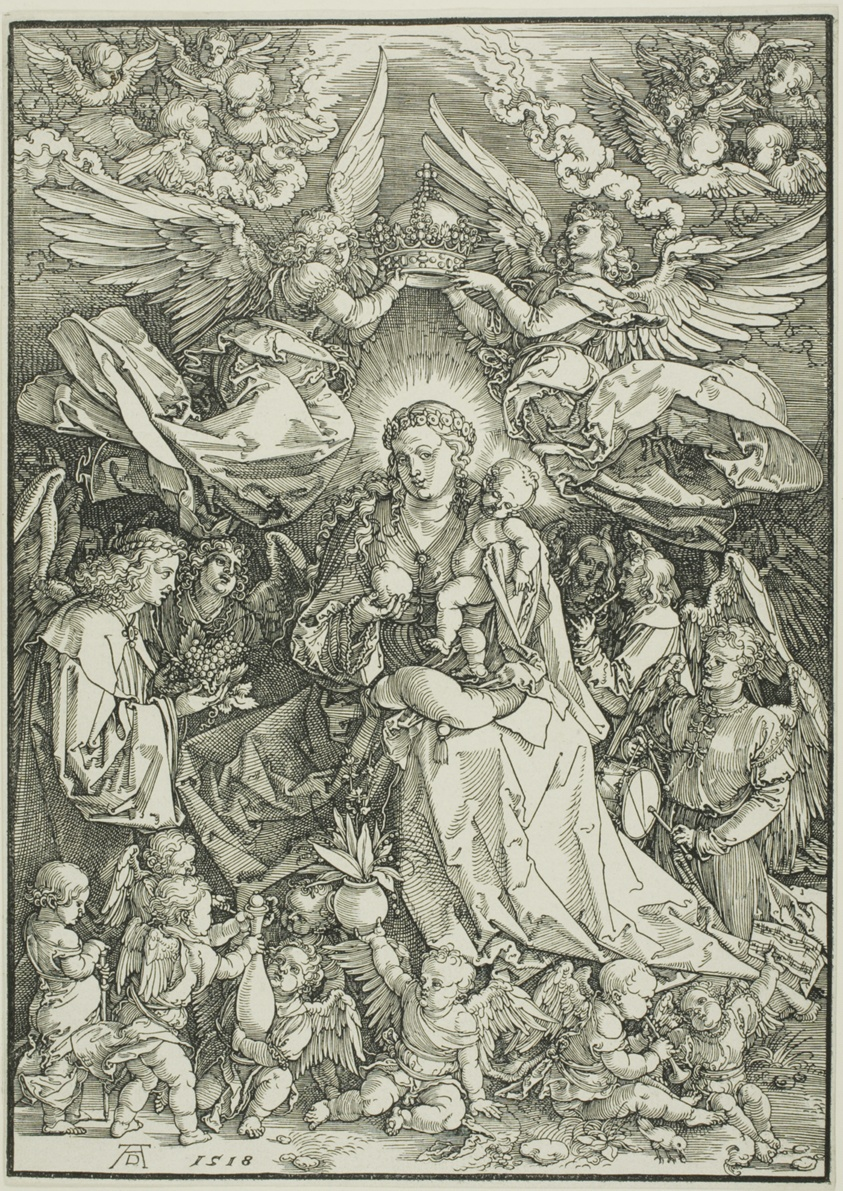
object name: Print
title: Madonna Queen of Angels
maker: Albrecht Dürer (German, 1471-1528)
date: 1518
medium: Woodcut in black on ivory laid paper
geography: Germany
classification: woodcut; print; prints and drawing; paper